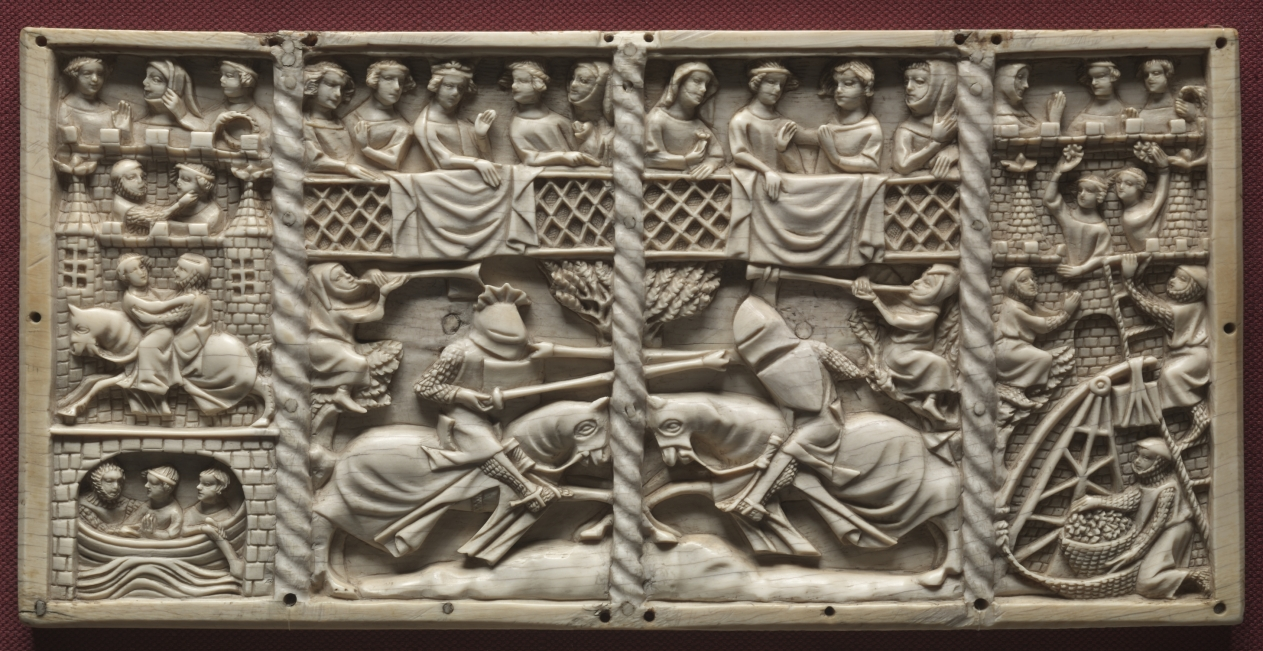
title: Panel from a Casket with Scenes from Courtly Romances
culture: France, Lorraine?, Gothic period, 14th century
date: c. 1330–50 or later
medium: ivory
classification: Ivory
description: Among the most lavish and deluxe products of French ivory workshops of the 1300s were large caskets carved with elaborate scenes drawn from courtly romances. The panel shown here comes from such a casket. The largest panel (here) once formed the lid and depicts a tournament, the most splendid and romantic of knightly activities. Just to the right is a favorite allegory of chivalric love: knights assaulting the castle of love. These images suggesting chivalry, fertility, virginity, youth, and an idealized courtly love likely derive from manuscripts including the Roman de la Rose and the poems of Chrétien de Troyes. Such texts were often found within the libraries of the aristocracy, so the casket’s symbolic images would have been readily understood. Such caskets may have originally been gifts between a man and a woman. The expense of the material, ivory, suggests they were produced for an elite, aristocratic clientele.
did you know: Two knights in mail surcoats and helms joust here with blunted lances "for courtesy," a version of the joust known as the Joust of Peace.